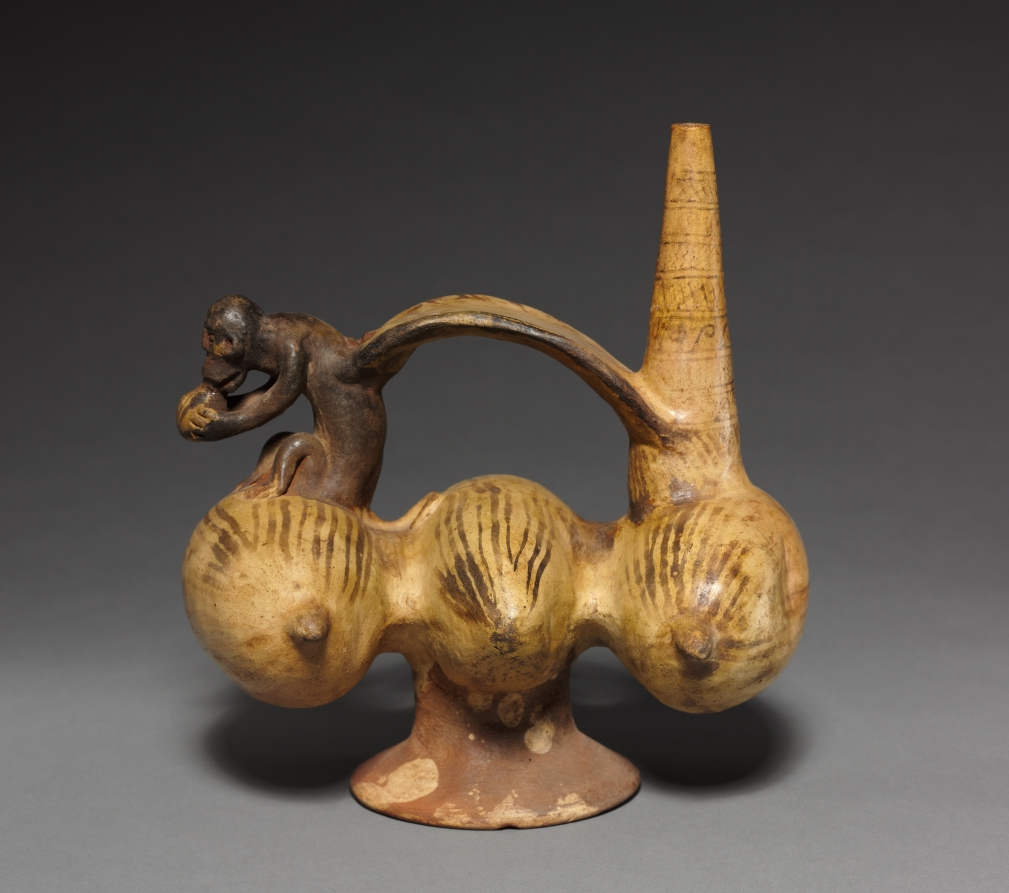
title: Stirrup Jar with Monkey and Three Fruits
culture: Peru, North Coast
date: 1000 or later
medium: red earthenware decorated with cream-colored slip and brown pigment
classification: Ceramic